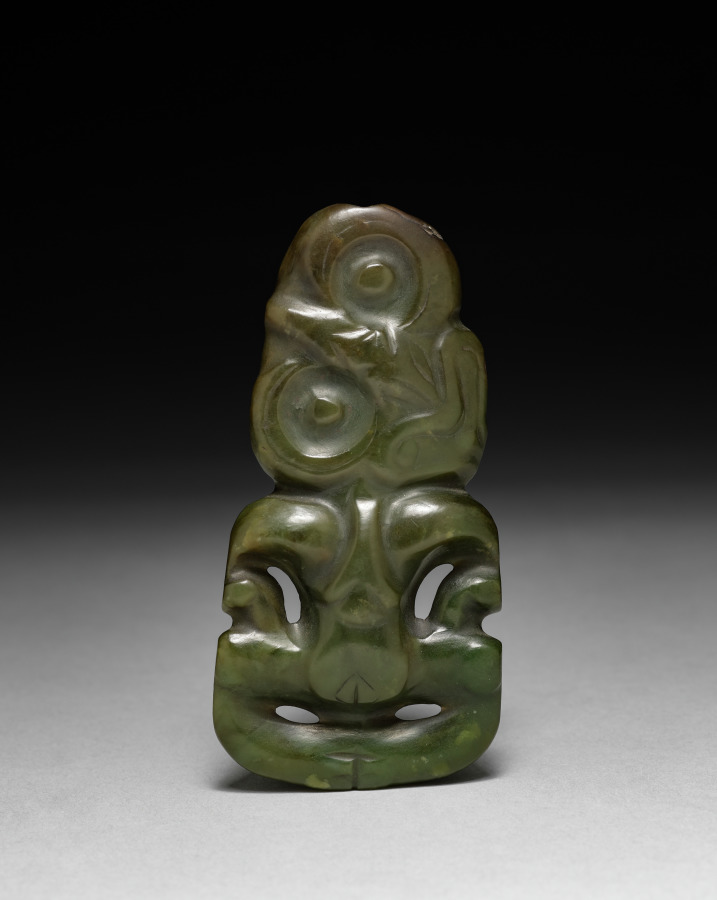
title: Pendant (Hei-tiki)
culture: Polynesia, New Zealand, Maori people, 19th century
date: 1800s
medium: nephrite (greenstone)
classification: Sculpture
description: Among the Māori, leaders are hereditary and imbued with mana, power and prestige that can be embodied and passed down in the artworks associated with them. Hei-tiki are among these treasured, mana-charged heirlooms, which connect the living to ancestors of the islands’ pre-European past. They may represent Hine-te-Iwaiwa, a legendary ancestress who is the exemplar of Māori womanhood and the patron of childbirth.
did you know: Hei-tiki may represent Hine-te-Iwaiwa, a legendary ancestress who is the exemplar of Māori womanhood.